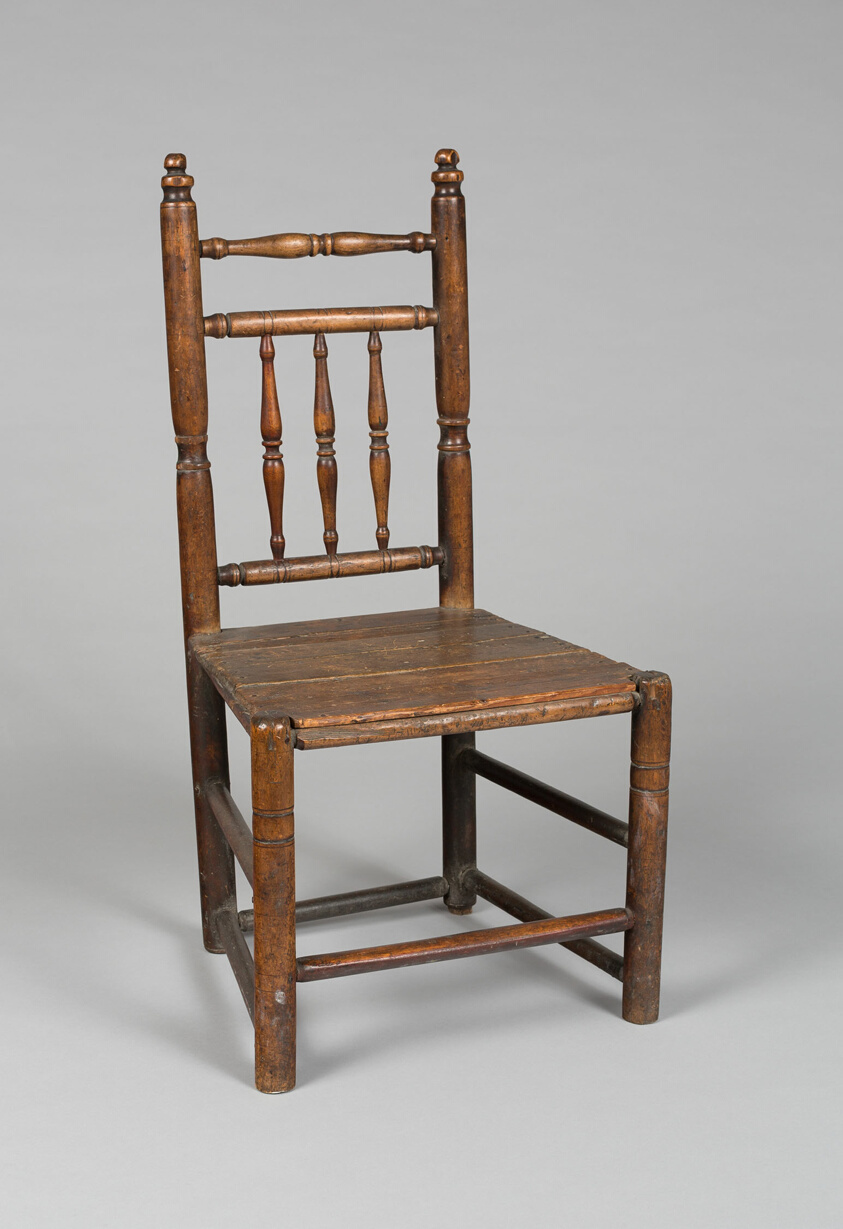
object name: Furniture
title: Side Chair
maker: Artist unknown (American, 17th–18th century); New England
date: 1660–1700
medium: Maple and birch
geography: New England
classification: seating; furniture; american decorative arts; american arts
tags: furniture